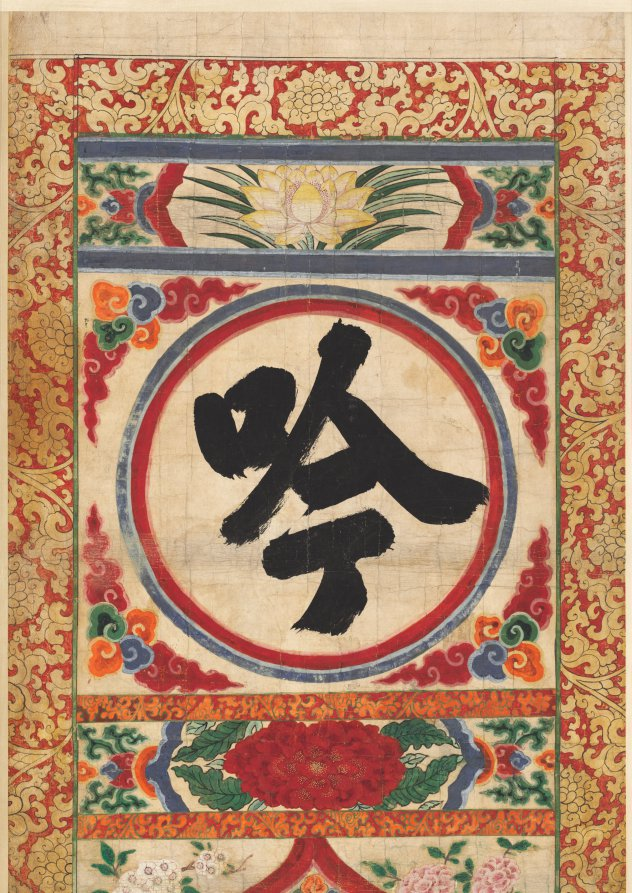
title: Painted Panel of Character "Recite"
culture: Korea, Joseon dynasty (1392–1910)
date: early 1900s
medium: hanging scroll, ink and color on paper; unmounted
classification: Painting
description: This set of four colorful hanging scrolls may have been used in an outdoor Buddhist ritual to evoke heavenly blessings. Each hanging scroll bears four different character; tiger, dragon, whistle, and recite. Traditionally, tiger and dragon belong to the four directional guards, respectively west and east.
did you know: This set of four colorful hanging scrolls may have been used in an outdoor Buddhist ritual to evoke heavenly blessings.